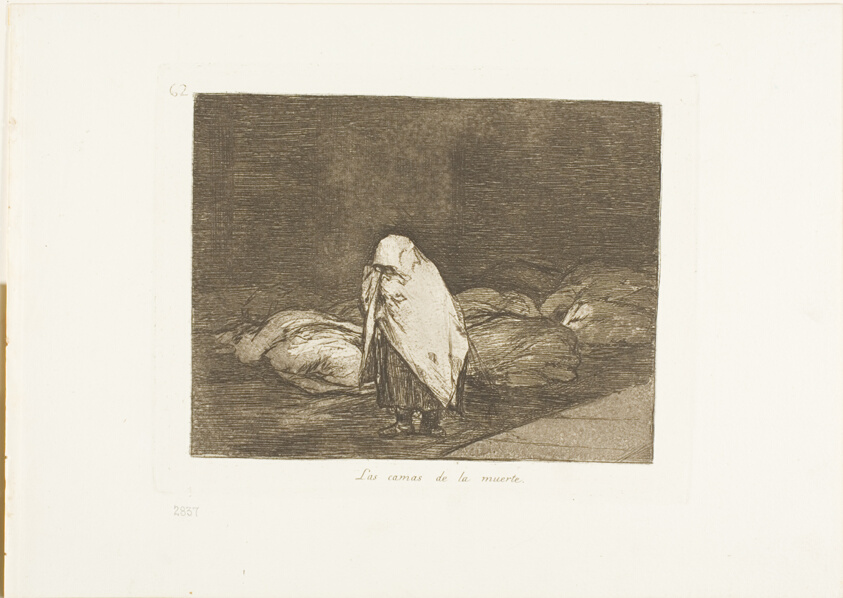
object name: Print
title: The Beds of Death, plate 62 from The Disasters of War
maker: Francisco José de Goya y Lucientes (Spanish, 1746-1828)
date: 1812/15, published 1863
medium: Etching, lavis, drypoint, burin and burnishing on ivory wove paper with gilt edges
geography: Spain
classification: etching; print; prints and drawing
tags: war